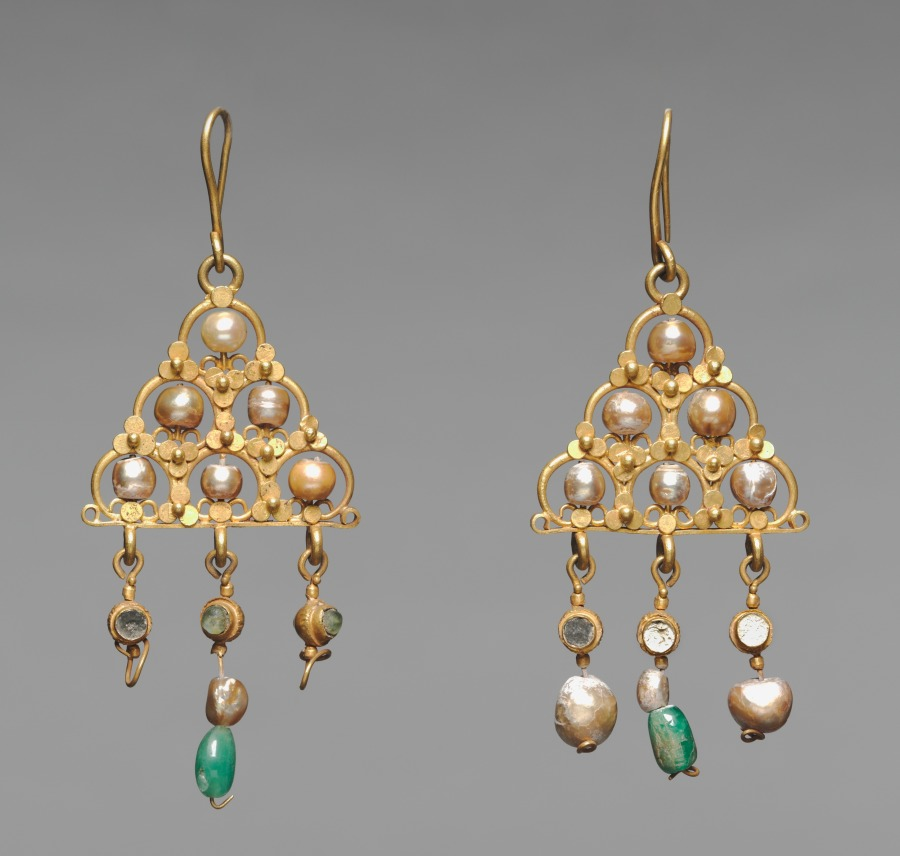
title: Earrings (pair)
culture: Byzantium, early Byzantine period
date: 600s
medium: gold, pearls, glass, and emeralds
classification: Jewelry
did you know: This piece of jewelry was worn by a woman in the fashionable courts of Byzantium. Decorated with pearls, glass, and emeralds, these gold earrings are delicate, yet eye-catching. Do you think these chandelier-style earrings would be fashionable today?